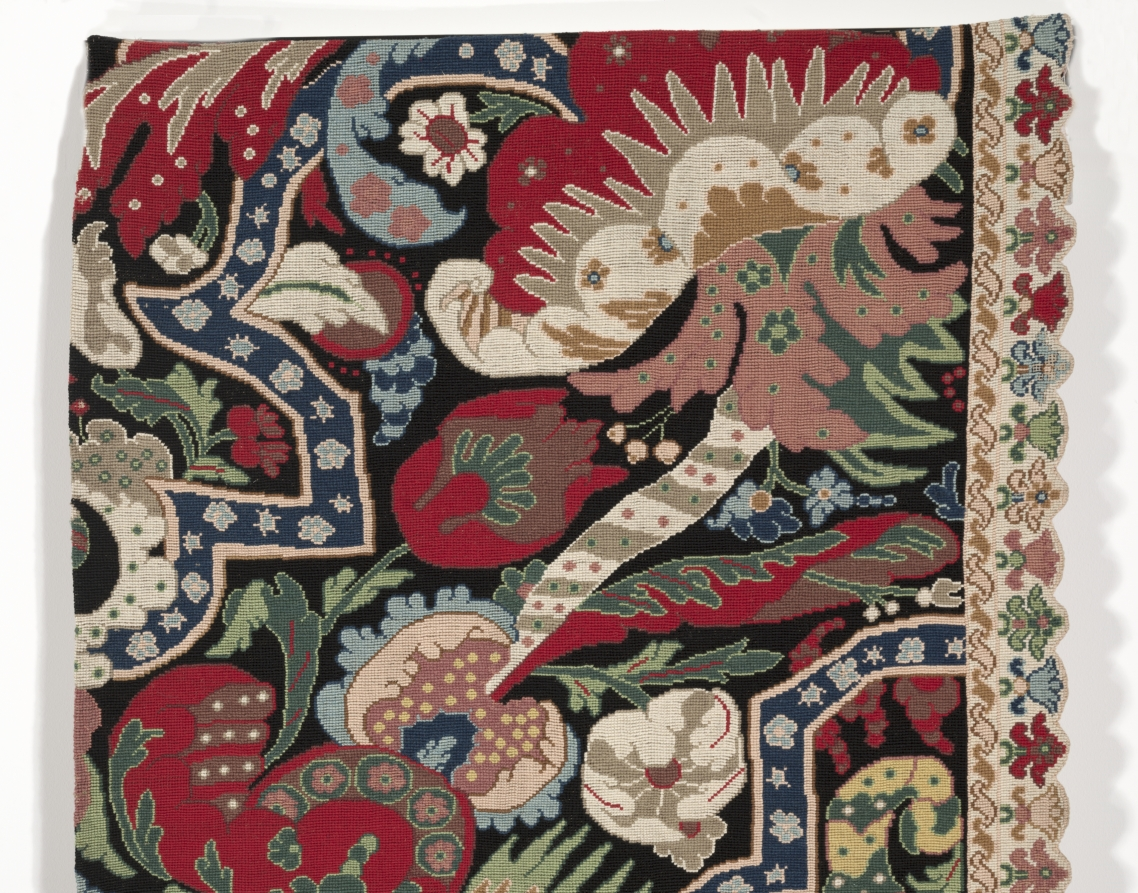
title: Needlework Bed Hanging in the Bizarre style (right half)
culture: France, 18th century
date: 1710–20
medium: needlework, tent and cross stitch embroidery on canvas; silk, wool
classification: Embroidery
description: This panel is one of a pair that would have hung originally around a bed post as part of a full set of hangings on a bedstead in the early 1700's. Elaborate textile hangings were a conspicuous display of wealth since many ladies received their friends within their bedchamber. A full set enveloped the entire bedstead and, when closed, helped retain warmth long after the fire had gone out. This particular pair of panels is remarkable in that they represent many hours of highly skilled needlework. Their design is known as a "bizarre" pattern, which mimicked woven silks of the same era that were asymmetrical, boldly stylized adaptations of Asian fabrics that were coming into the European market from the trading routes at the time.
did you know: The design of this needlework panel is known as a "bizarre" pattern.